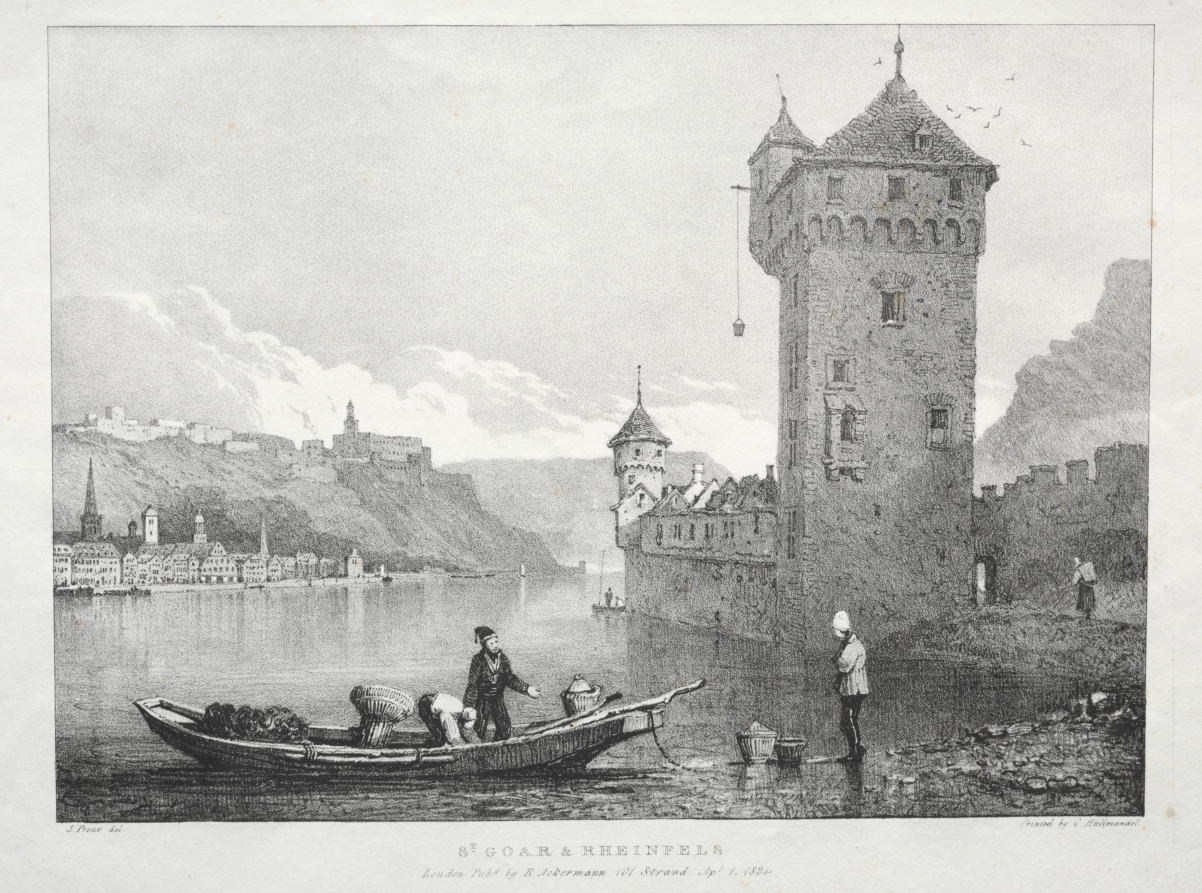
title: St. Goar and Rheinfels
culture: England, 19th century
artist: Samuel Prout (British, 1783–1852)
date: 1824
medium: lithograph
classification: Print